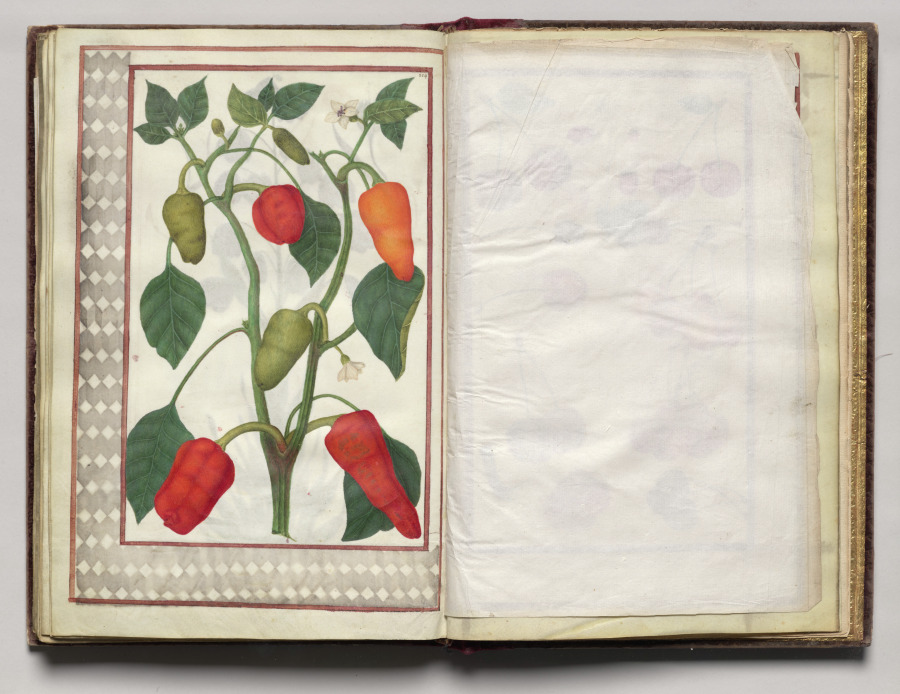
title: Pepper Plant with Geometric Border, folio 46 (verso), from Florilegium (A Book of Flower Studies)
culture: France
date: 1608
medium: watercolor, ink, silver, and gold over occasional traces of pencil, on vellum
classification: Bound Volume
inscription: Dated: Poitiers 1608 (on frontispiece) Signed: On frontispiece in black ink, lower right: Van Kuyk Notation on drawing: Frontispiece: in pencil, lower margin: * élève de Van Kessel, peintre flammand (* in pencil also appears in front of Van Kuyk's name).